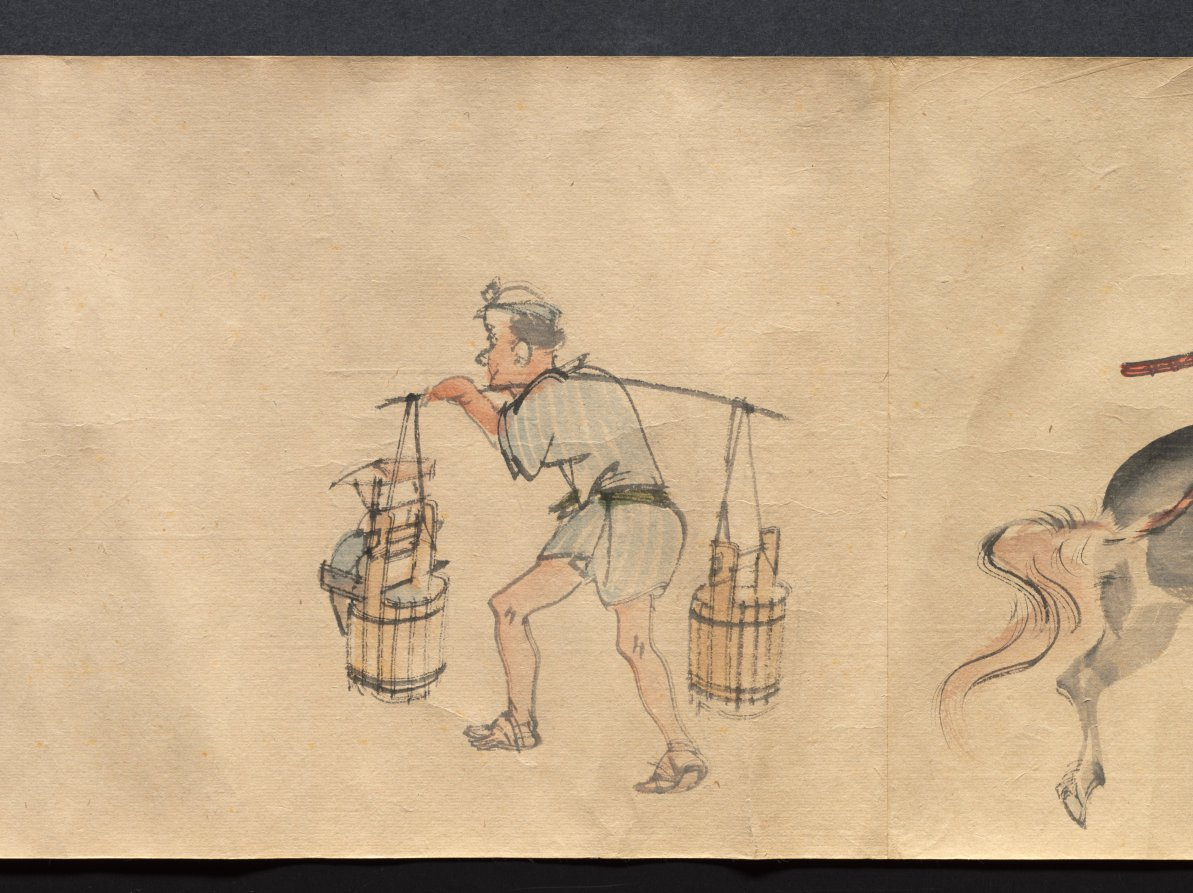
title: Festival Scenes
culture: Japan, Edo period (1615–1868)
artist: Suzuki Nanrei (Japanese, 1775–1844)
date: c. 1795–1844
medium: handscroll; ink and color on paper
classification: Painting